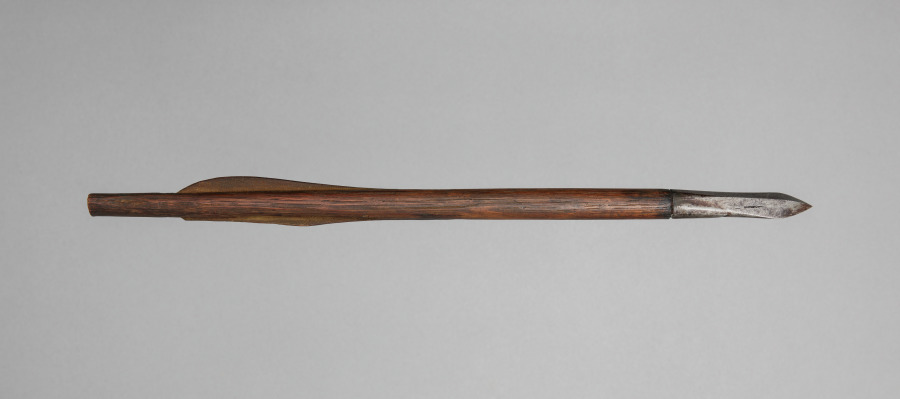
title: Crossbow Bolt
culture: Germany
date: 1500s-1600s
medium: wood, leather, steel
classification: Arms and Armor